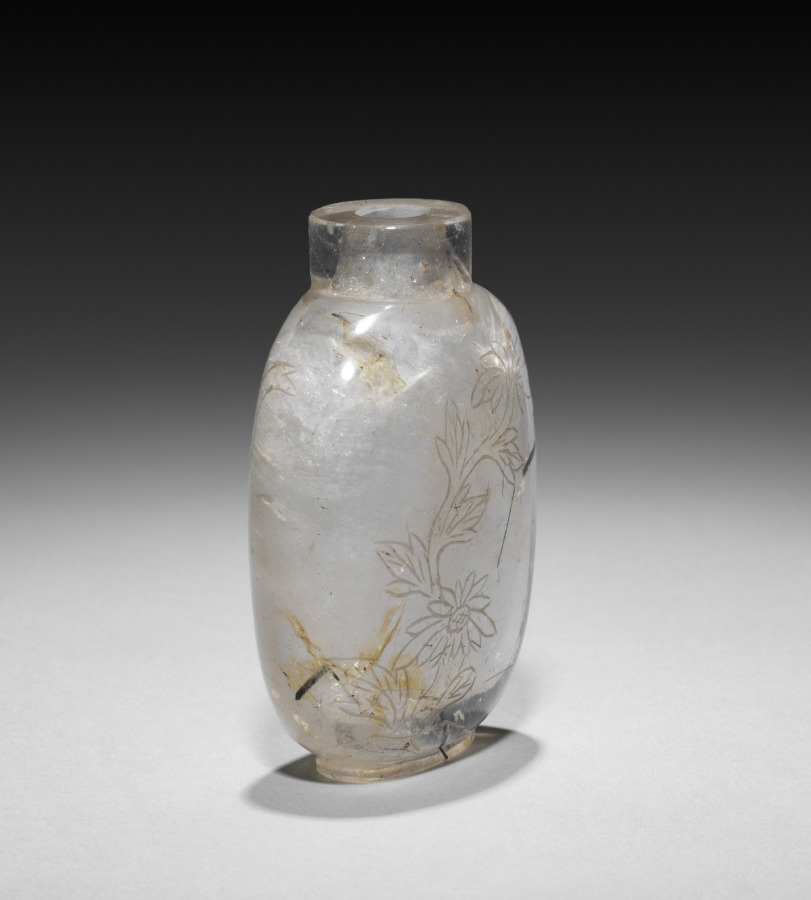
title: Snuff Bottle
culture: China, Qing dynasty (1644-1911)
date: 1644–1911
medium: glass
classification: Glass